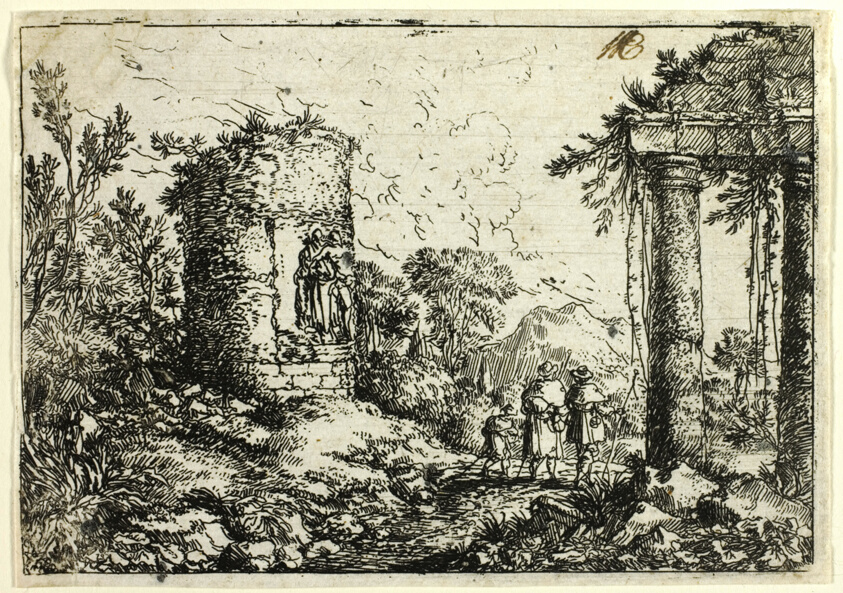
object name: Print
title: Italian Landscape with Ruins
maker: Jonas Umbach the Elder; German, 1624-1693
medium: Etching in black on ivory laid paper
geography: Germany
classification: etching; print; prints and drawing